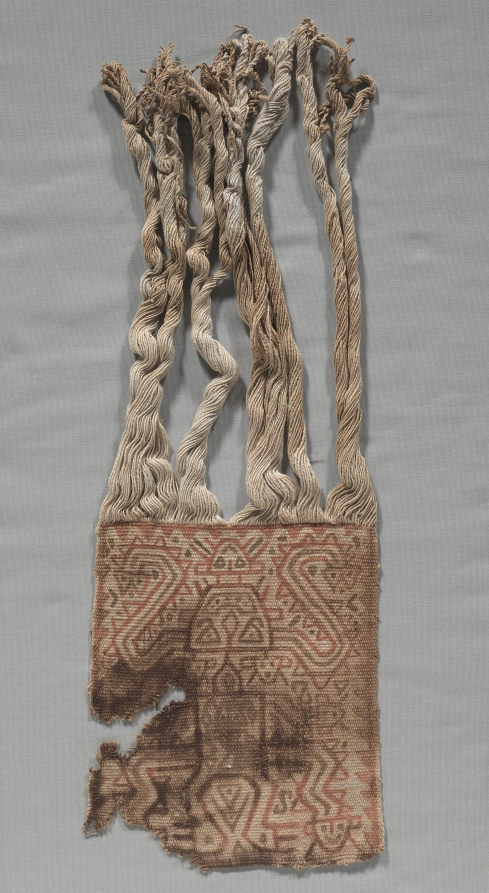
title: Mummy Bundle "Mask"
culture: Peru, South Coast, Ica Valley, Ocucaje site, Paracas style (700 BCE–1 CE)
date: 200–1 BCE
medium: plain warp-faced cloth, painted: cotton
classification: Textile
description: The Paracas people of Peru's South Coast buried their dead in pear-shaped mummy bundles made of a seated human body carefully wrapped in garments and other textiles. Sometimes a painted cloth was placed at the top of the bundle, as though it served as the bundle's face, head, or "mask." The cloth was padded on the back so it curved outward like a face, and the tress-like yarns (unwoven warps) at the upper edge were arranged around a solid cotton disk that, in turn, was wrapped with a headband. Some cloths were painted with mask-like faces, and others with full figures, apparently mythical creatures.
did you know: These masks fall into two categories, those with only a face and those with a full-bodied figure.